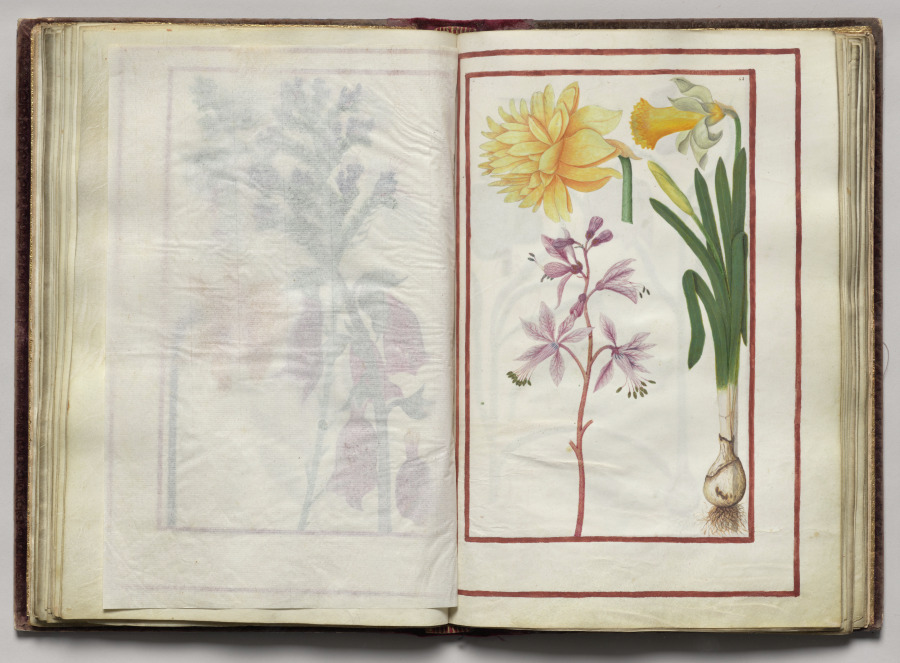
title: Double Narcissus and Single Narcissus, folio 26 (recto), from Florilegium (A Book of Flower Studies)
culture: France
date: 1608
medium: watercolor, ink, silver, and gold over occasional traces of pencil, on vellum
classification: Bound Volume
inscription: Dated: Poitiers 1608 (on frontispiece) Signed: On frontispiece in black ink, lower right: Van Kuyk Notation on drawing: Frontispiece: in pencil, lower margin: * élève de Van Kessel, peintre flammand (* in pencil also appears in front of Van Kuyk's name).